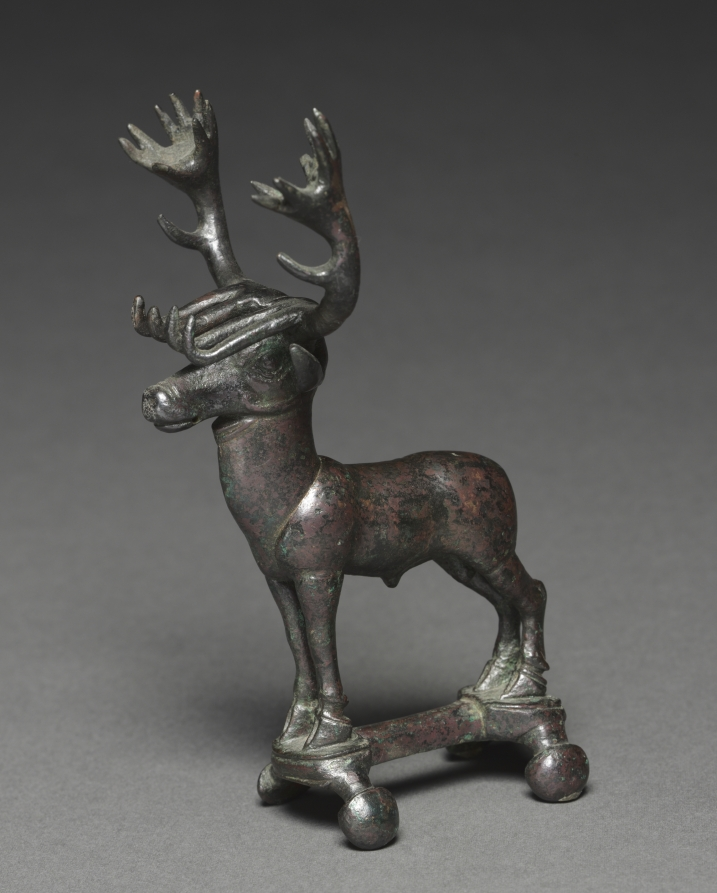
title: Stag Poletop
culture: Eastern Anatolia, Hittite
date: 1400–1200 BCE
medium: bronze, solid cast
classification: Sculpture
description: The stag was sacred to the Hittite god of the countryside.